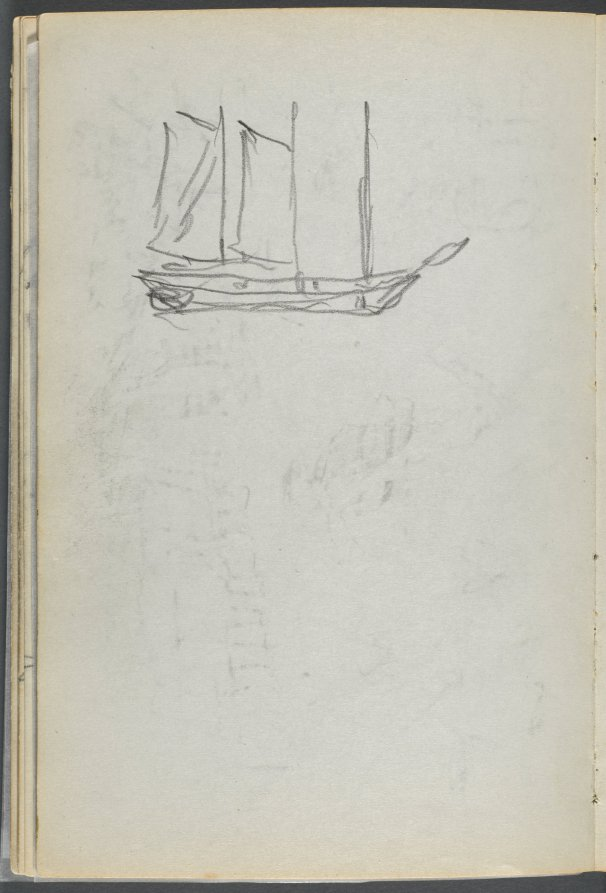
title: Sketchbook, The Dells, N° 127, page 106: Sailboat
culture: America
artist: Maurice Prendergast (American, born Newfoundland [now Canada], 1858–1924)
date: c. 1919–1921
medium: graphite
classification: Bound Volume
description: This sketchbook contains 59 pages of graphite drawings and 16 watercolors made at various locations on Cape Ann, Massachusetts.